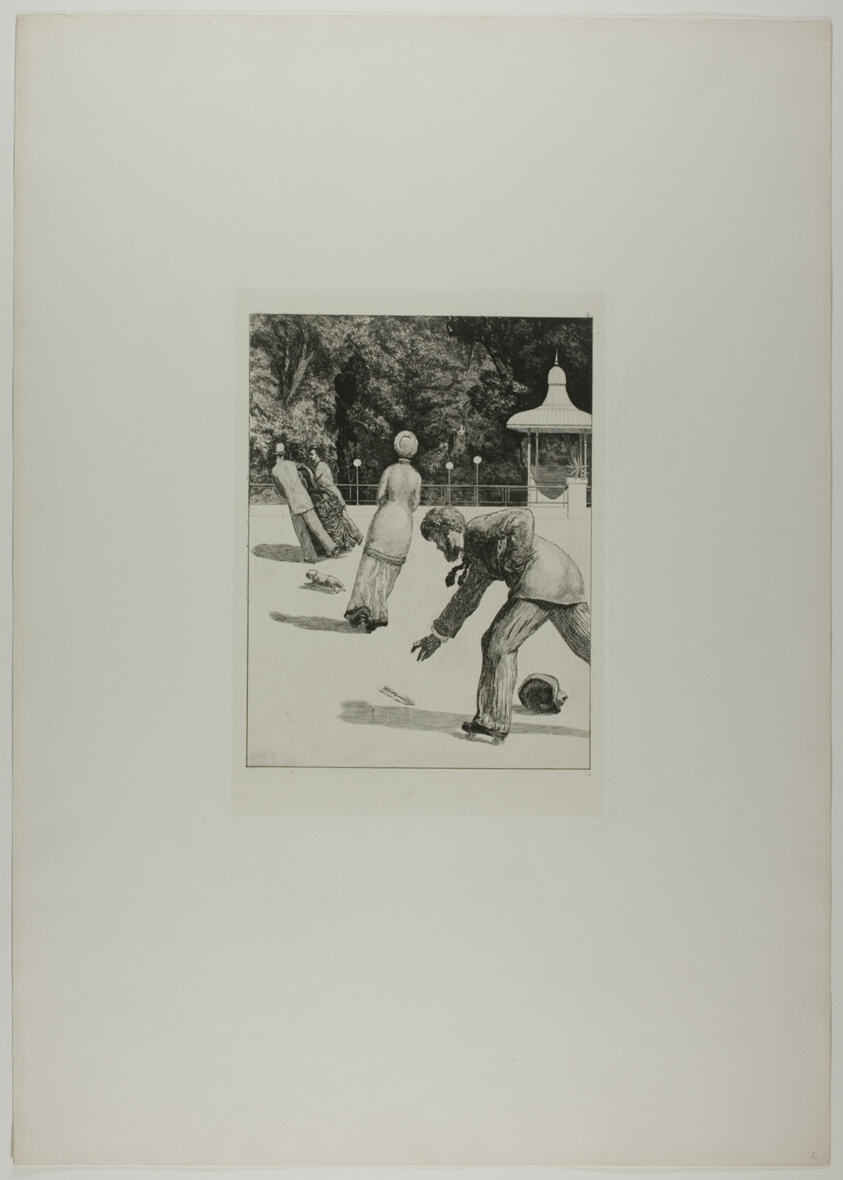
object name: Print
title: A Glove: Action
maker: Max Klinger (German, 1857-1920)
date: 1881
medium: Etching and aquatint on ivory chine collé on off-white wove paper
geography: Germany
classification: etching; print; prints and drawing